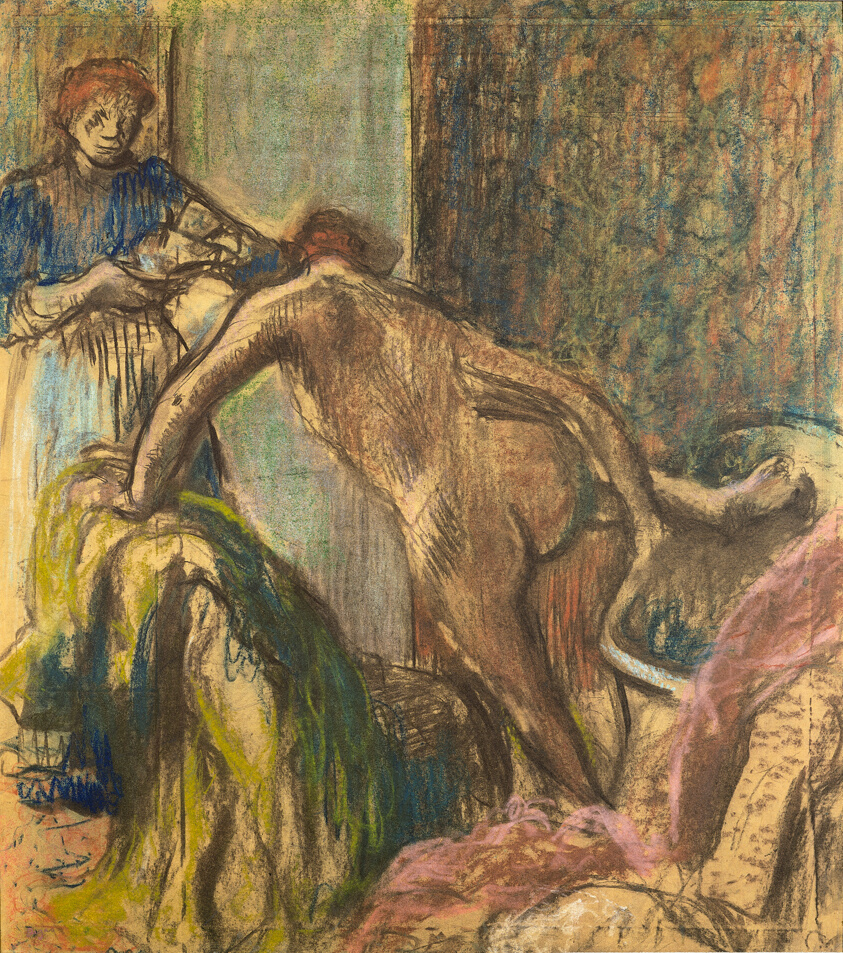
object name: Drawing and Watercolor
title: Breakfast after the Bath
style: Impressionism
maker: Edgar Degas; French, 1834-1917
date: 1895/98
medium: Pastel on paper laid down on board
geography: France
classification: pastel; drawings (visual works); prints and drawing; paper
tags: women, work, domestic scenes, everyday life (genre), water